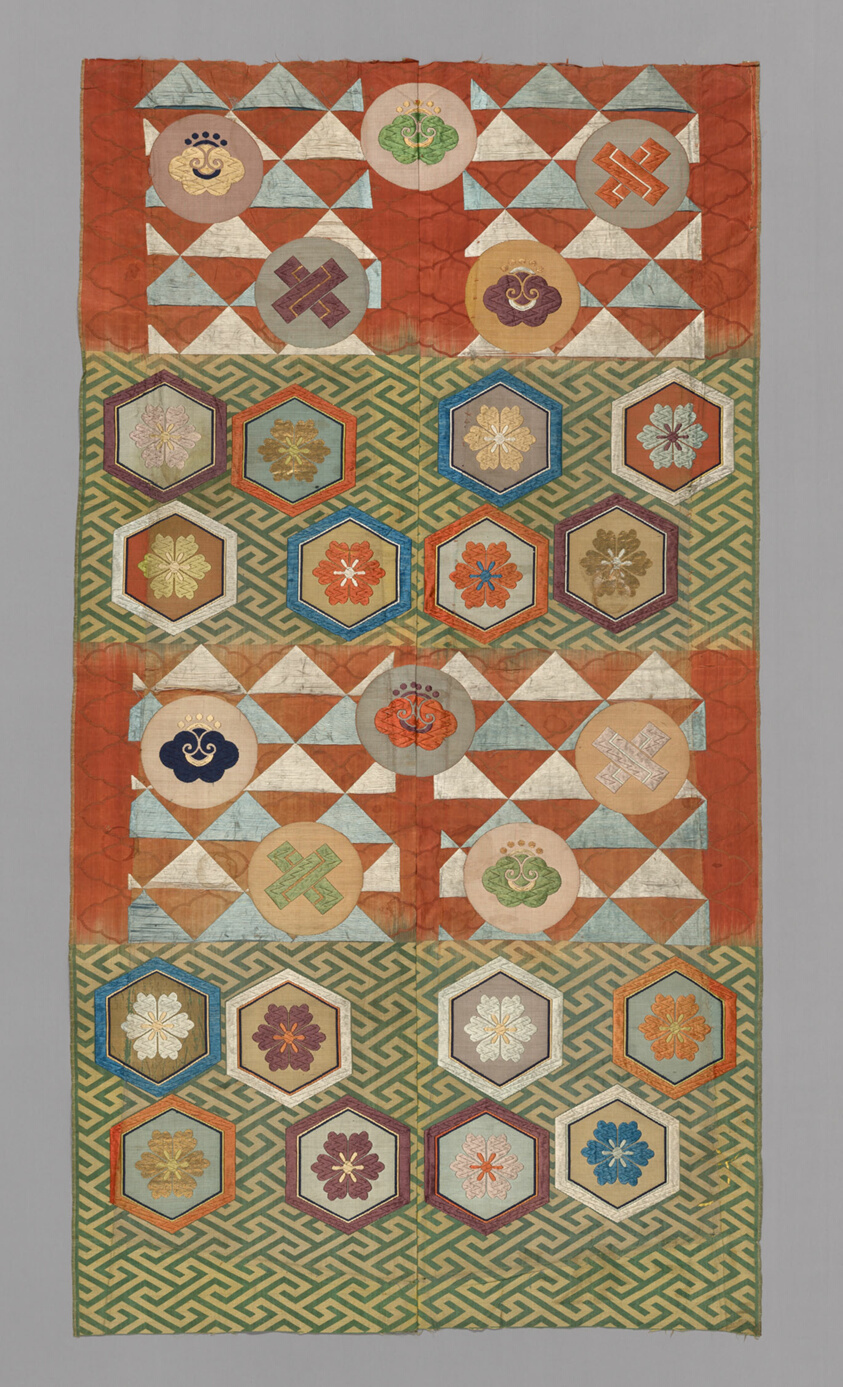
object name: Textile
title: Karaori (Noh Costume)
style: Japanism, asian, edo (japanese period)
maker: Japan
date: Edo period (1615–1868), 1775/1825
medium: Brocaded; two sections sewed together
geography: Japan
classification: textile; weaving; costume; dress (garment); clothing